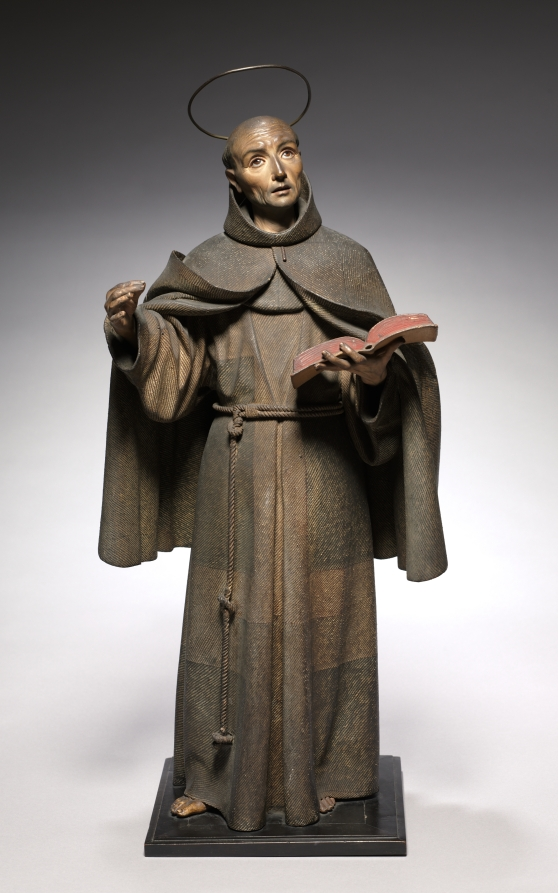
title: Saint Peter of Alcántara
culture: Spain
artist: Pedro de Mena (Spanish, 1628–1688)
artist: and Workshop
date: c. 1663–70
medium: painted wood, with ivory and glass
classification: Sculpture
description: Painted wood sculpture from Spain in the 1600s involved a team of artisans working under a lead sculptor. The sculptor first carved numerous pieces of wood in complex forms. So the paint would stick properly, these fragments were delicately covered in gesso (a combination of white chalk and glue made from animal collagen), preserving the subtle woodcarving underneath. The rough surface of the saint's face—reflecting his age and hardships—came from texturing the gesso with a brush. The glass eyes, probably imported from Venice, were inserted from behind the face before the wood pieces were attached. Finally, the eyelashes were added for a further touch of realism. A painter created the appearance of coarse sackcloth in a distinctive style, with yellow strokes rising off the surface. Smoother brushstrokes form the flesh tones, even revealing the saint's five-o'clock shadow. Unlike other kinds of painting, sculpture from southern Spain at this time was usually not covered in varnish; sculptors prized the unvarnished paint for its realistic effect, although it makes the surface exceptionally delicate and susceptible to dust and dirt, which more easily sticks to the surface.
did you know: Peter of Alcantara was so dedicated to his work he slept only 90 minutes a night--he's the patron saint of night watchmen!